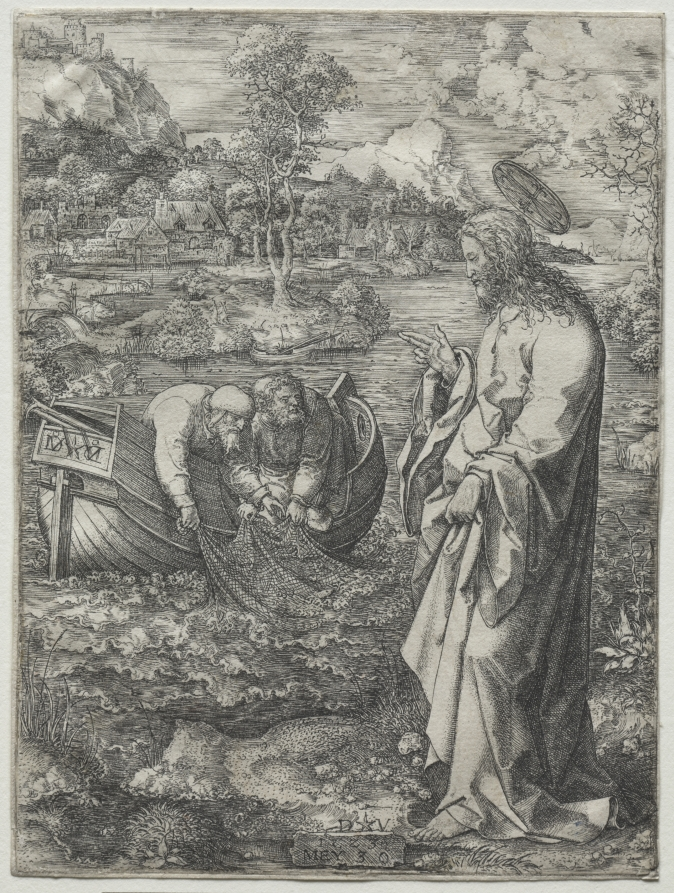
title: Jesus Calling to St. Peter and St. Andrew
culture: Netherlands, 16th century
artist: Dirk Vellert (Netherlandish, 1480/85–1547)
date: 1523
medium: engraving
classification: Print